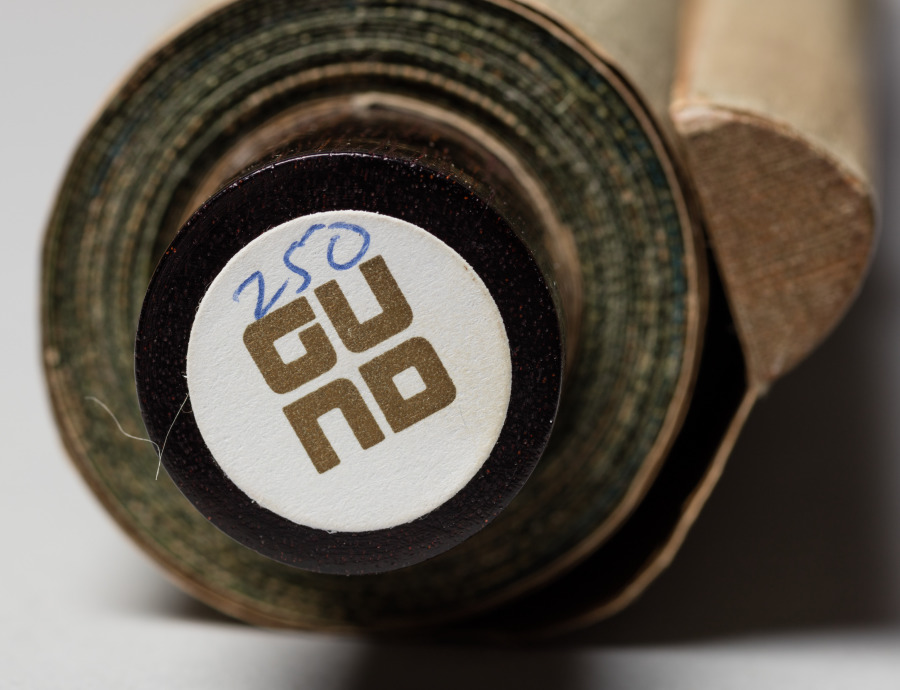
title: Gibbons Reaching for the Moon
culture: Japan, Edo period (1615–1868)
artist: Kano Tan’yū (Japanese, 1602–1674)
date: 1600s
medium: Hanging scroll; ink and light color on silk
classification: Painting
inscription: signed: "Tan'yūsai hitsu"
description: Long-armed gibbons form a chain to reach down from a tree, hoping to touch what they believe is the moon. In fact, the orb remaining beyond their grasp is the full moon’s reflection in the still surface of a pond or lake. The image is a common metaphor for the deluded mind in Buddhist thought. Gibbons do not live in Japan but were known to Japanese painters of the premodern era through paintings brought from China.